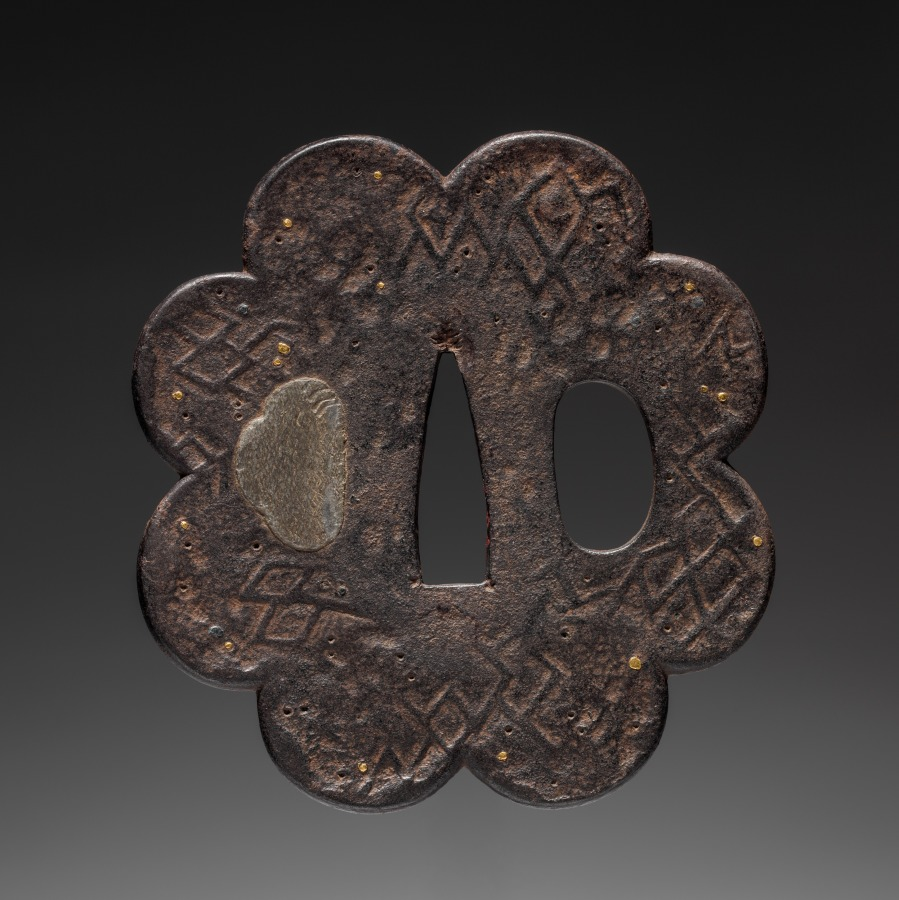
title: Sword Guard (Tsuba)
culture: Japan, possibly Edo period (1615-1868)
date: c. 1615–1868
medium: iron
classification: Arms and Armor